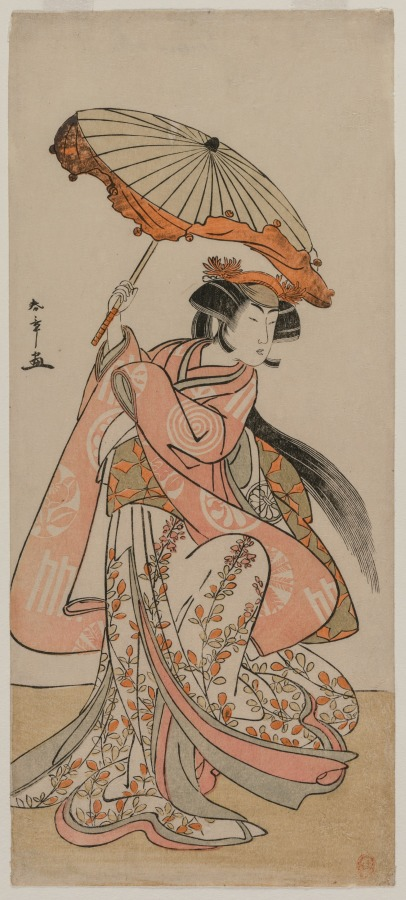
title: The Actor Segawa Kikunojo II Dancing with a Parasol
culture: Japan, Edo period (1615–1868)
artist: Katsukawa Shunshō (Japanese, 1726–1792)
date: late 1770s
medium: color woodblock print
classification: Print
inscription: Signature: Shunsho ga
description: The dancer's robe is decorated with the crests of three kabuki actors: Ichimura Uzaemon IX, Nakamura Nakazo I, and Nakamura Tomijuro I.